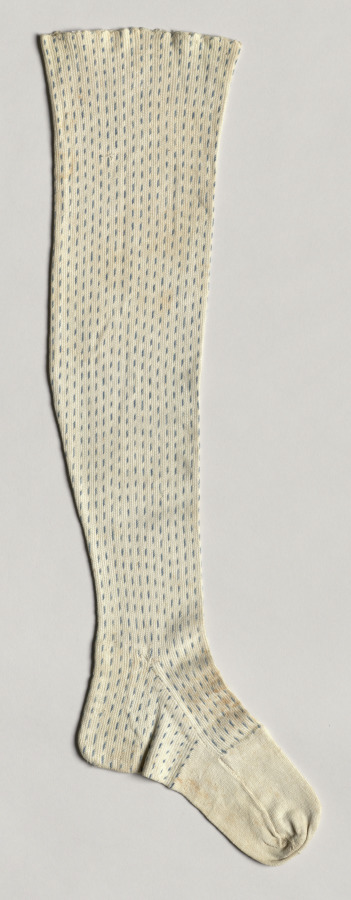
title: Stocking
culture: America, New York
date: 1790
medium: knitting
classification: Knitting